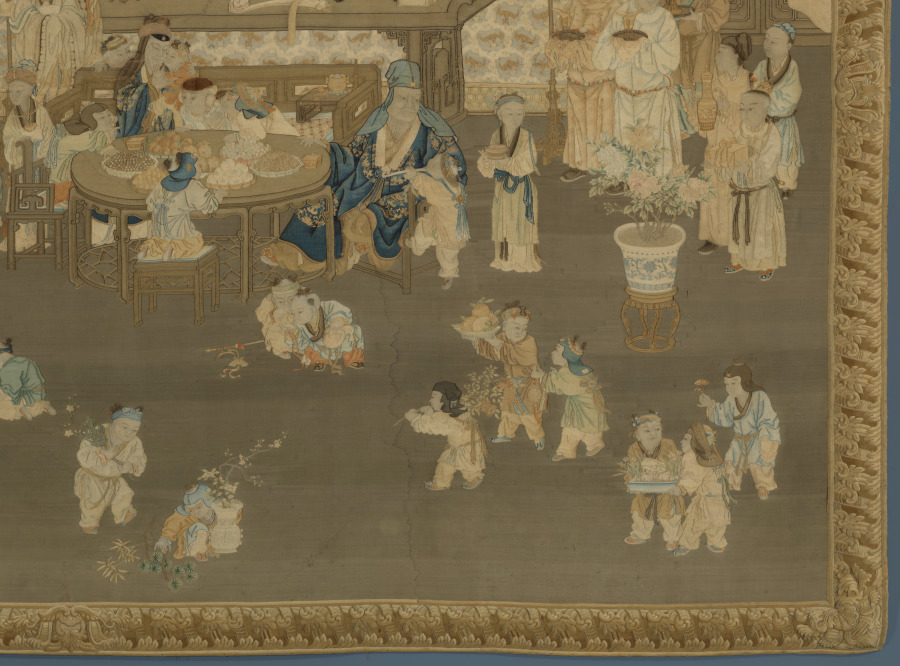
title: Family Gathering on New Year's Morning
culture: China, Qing dynasty (1644-1911)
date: late 1760s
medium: Silk and wool: tapestry weave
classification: Tapestry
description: This European-style tapestry depicts a family gathering, in a woven Western picture frame, that presumably once furnished the Hall of Cultivating the Mind (Yangxin dian) in the Forbidden City. The tapestry employs Western perspective and shading combined with the traditional Chinese subject of a family gathering in a palace, including motifs expressing wishes for good fortune and for a peaceful reign. In 1766, six French tapestries had been presented to the Chinese court. The Qianlong emperor was so intrigued that he commissioned tapestries in the French style from Suzhou. Records mention an imperial order for tapestries in the Western style, such as this one, in 1769, 1770, and 1775.